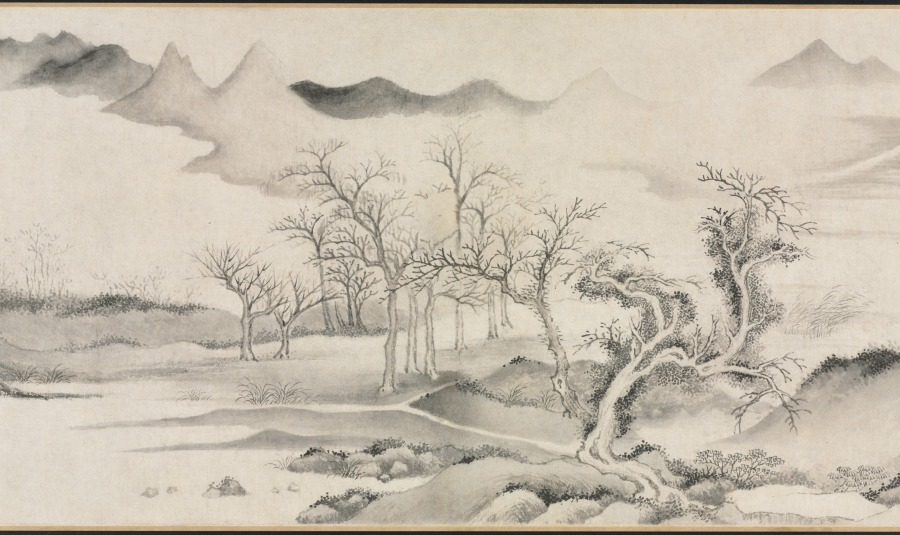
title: Water Village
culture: China, Ming dynasty (1368–1644)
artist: Wen Boren (Chinese, 1502–1575)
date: 1570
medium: handscroll; ink and light color on paper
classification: Painting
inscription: 隆慶庚午秋仿趙文敏筆. 五峰文伯仁 [印] 五峰山人; 文伯仁印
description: In the autumn of 1570, Wen Boren painted this seemingly unemotional scene of low-lying marshlands with a chain of rounded mountains in the background. A fishing boat is nestled on the shore near the village. Although paths and bridges traverse the landscape, only two people are visible in the stillness. From the restrained atmosphere of this landscape, one would never guess that Wen Boren was known as the “bad boy” of the Wu School for his explosive temper. As a younger man, he was even embroiled in a contentious lawsuit with his own uncle, Wen Zhengming (1470–1559), a master of Ming dynasty painting with whom he had trained. The ideal of the scholar-painter, or literati, was that an artist’s moral character is reflected in his paintings, so there was great incongruity between Wen Boren’s difficult personality and his restrained landscapes. A contemporary, Wang Shizhen, wrote this about him: "This gentleman is prone to behave odiously and screamed accusations at people. How is it possible for him to carry in his bosom such a wealth of scenic wonders?" Who knows what effort it took to subdue his fractious spirit to project an image of coolness and refined taste in his paintings?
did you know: A foreground tree has an eccentric twisting silhouette and pepper-dot "halo" of leaves.